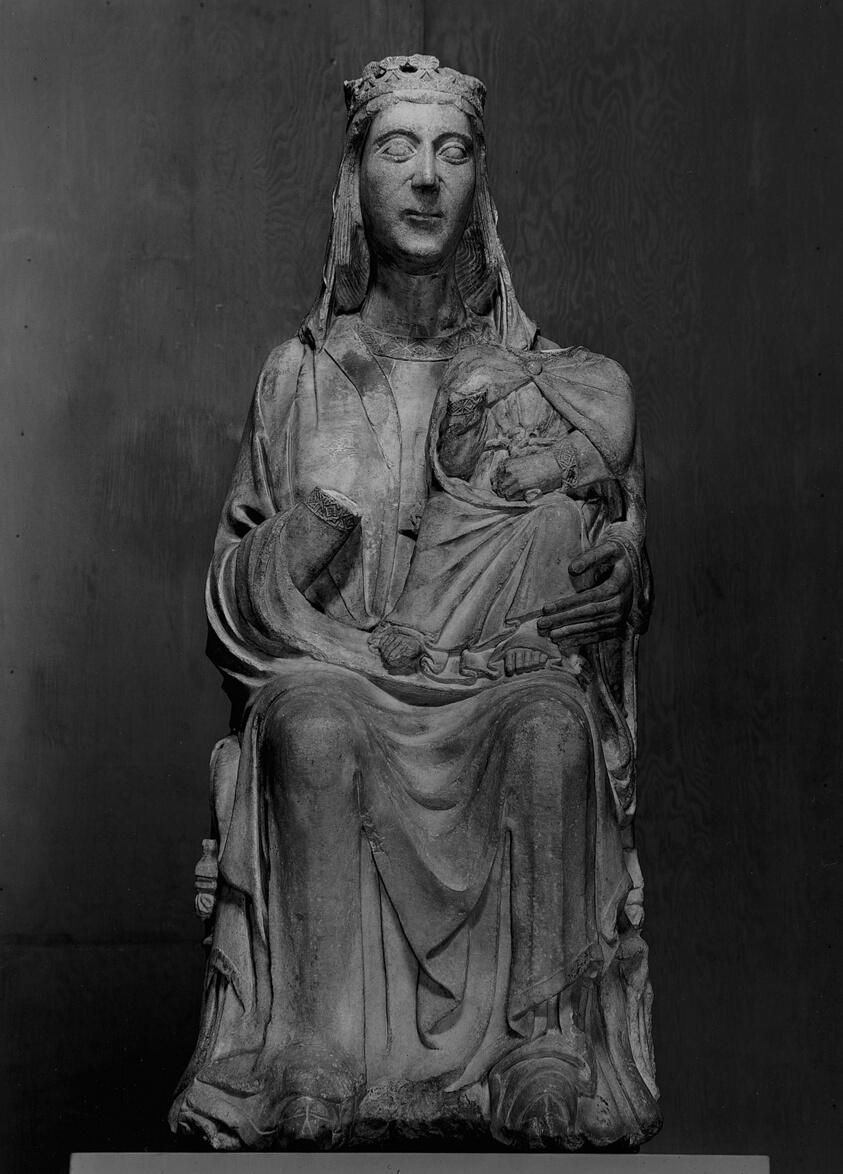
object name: Sculpture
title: Madonna and Child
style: 14th century, 15th century, medieval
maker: Italian; Milan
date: 1350/1400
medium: Marble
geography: Italy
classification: large scale; sculpture; sculpture/stone; Italian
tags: Virgin and child/Madonna and child, babies, child, Christian subjects, Christianity, Jesus, mother, mother and child, religion, religious, religious figures, religious scenes, sons, Virgin Mary, woman, woman with children